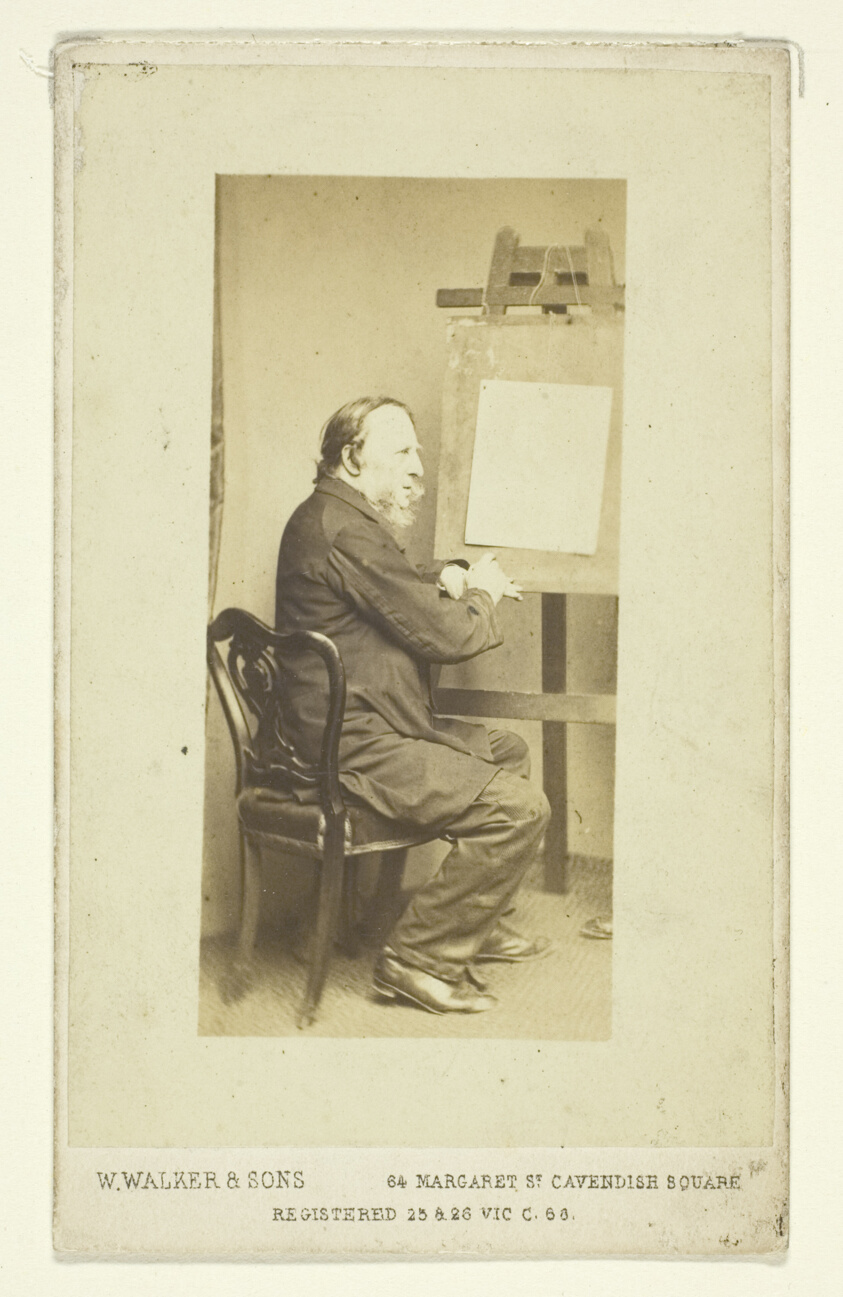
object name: Photograph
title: George Cruikshank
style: 19th century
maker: W. Walker & Sons; English, active 1860s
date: 1860/69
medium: Albumen print (carte-de-visite)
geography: England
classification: carte-de-visite (albumen); albumen silver print; photographic process; photography; photograph